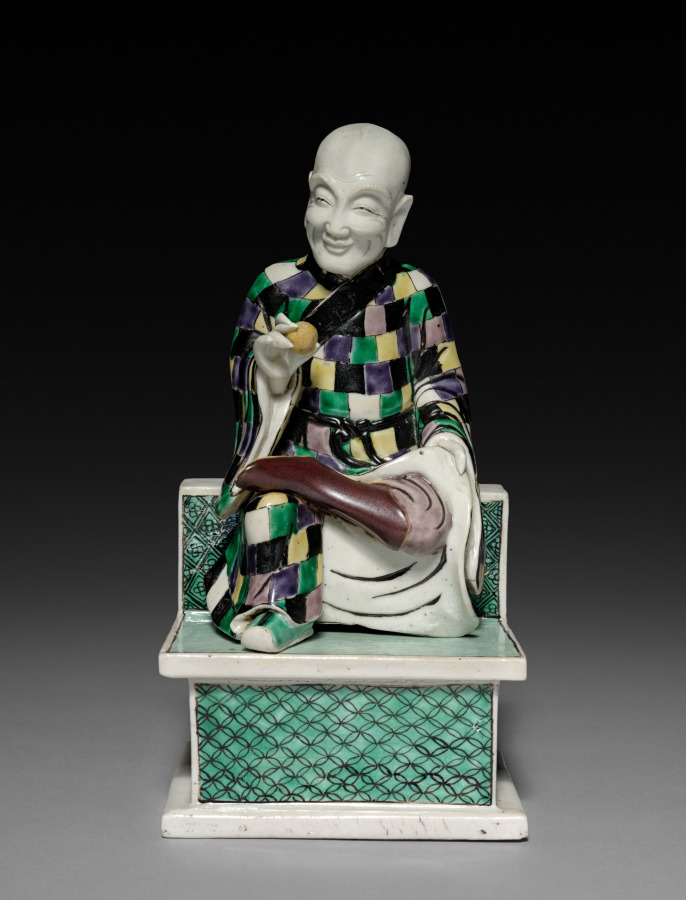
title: Lohan (Arhat) Holding a Peach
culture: China, Jiangxi province, Jingdezhen kilns, Qing dynasty (1644–1911), Kangxi reign (1662–1722)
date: 1662–1722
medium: porcelain with famille verte overglaze enamel decoration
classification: Ceramic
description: Lohan are disciples of Buddha with supernatural powers and eccentric behaviors. This lohan is holding the peach of longevity (shoutao), while its mate is holding the fu-dog, symbolizing good luck. With carefree smiles and playful gestures, these two figures embody a humorous attitude and a detachment from worldly affairs. This pair of porcelain figures was perhaps part of a house altar set or a decorative item in a household.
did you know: This lohan with a bald head wears a monk’s robe made of patches.